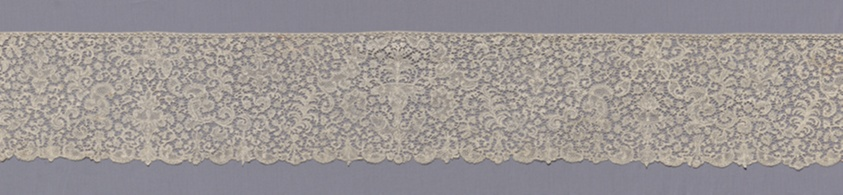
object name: Textile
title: Lace Flounce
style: 18th Century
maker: Flanders, Brussels (present day Belgium)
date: 1701-25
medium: Linen, bobbin part lace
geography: Flanders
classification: textile; lace - bobbin; lace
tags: fountains, cartouches, arabesque, vines